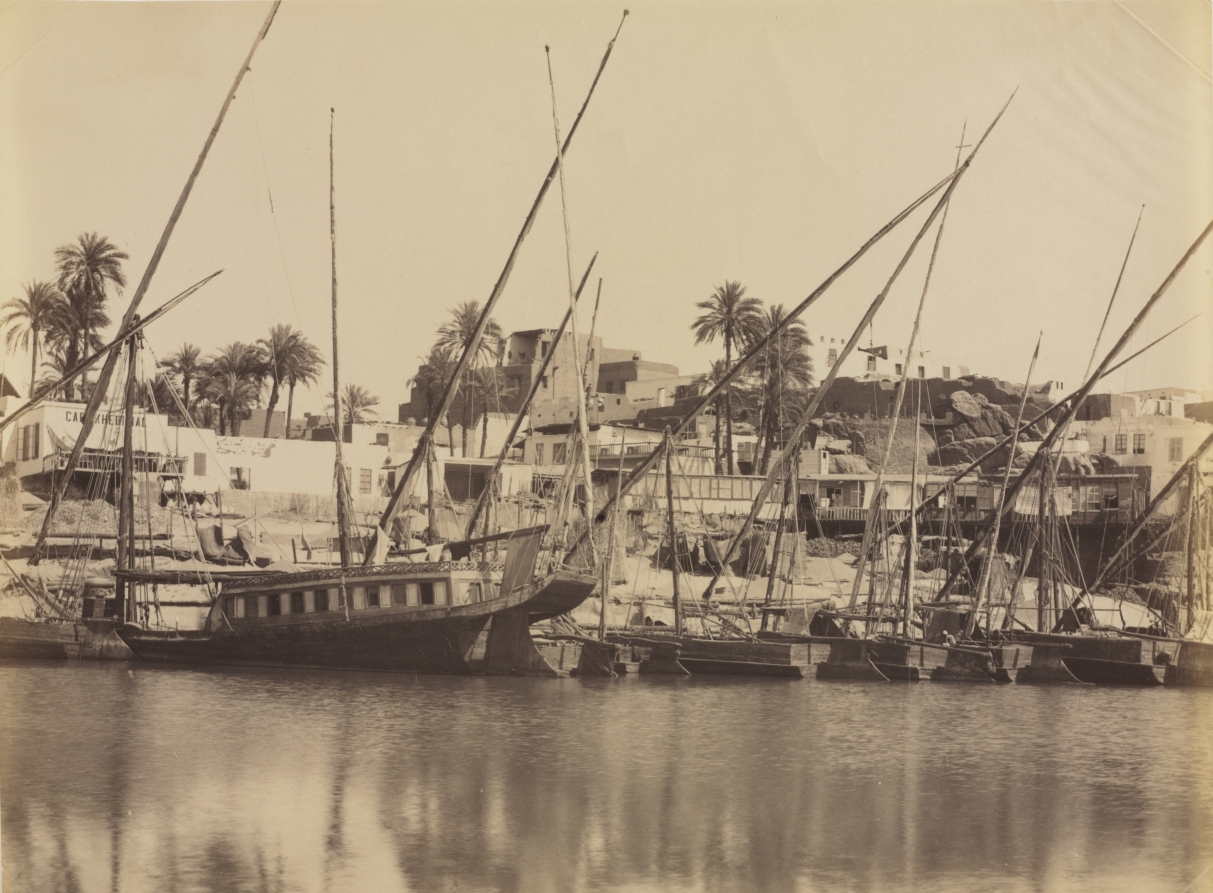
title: View of Aswan - Along the Nile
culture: England, 19th century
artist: Antonio Beato (British, c. 1825–1903)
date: c. 1870s - 1880s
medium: albumen print from wet collodion negative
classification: Photograph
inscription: Written in pencil on verso: "Assouan"; "47/vue d'assouan/le bord du Nil"; "AB-5302-Z"